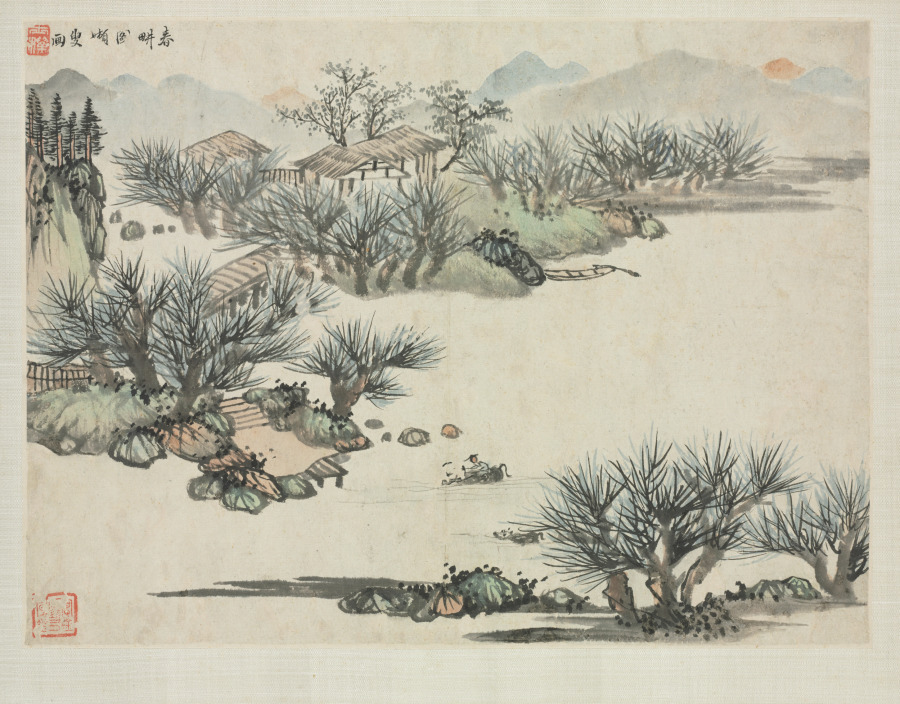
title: Landscape Album in Various Styles: Spring Plowing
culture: China, Qing dynasty (1644-1911)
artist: Zha Shibiao (Chinese, 1615–1698)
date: 1684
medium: Album leaf; ink and light color on paper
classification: Painting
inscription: Artist's inscription, signature, and seal: A picture of spring plowing. Painted by an Aging Idler. [seal] Shibiao.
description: Zha Shibiao, a native of Anhui province, moved to Yangzhou later in his career, like so many of his fellow countrymen. At age 68, he painted this album with seasonal landscapes in various styles. Painted in fresh colors and wet strokes, all depict typical scenes of Jiangnan, the Yangzi delta: a herdboy on a buffalo wading through water, boating on the stream to the Peach Blossom Spring at Wulin, a waterfront town shrouded in mist, a scholar on his donkey enjoying the red autumn leaves, and drinking tea on a boat while watching migrating birds.